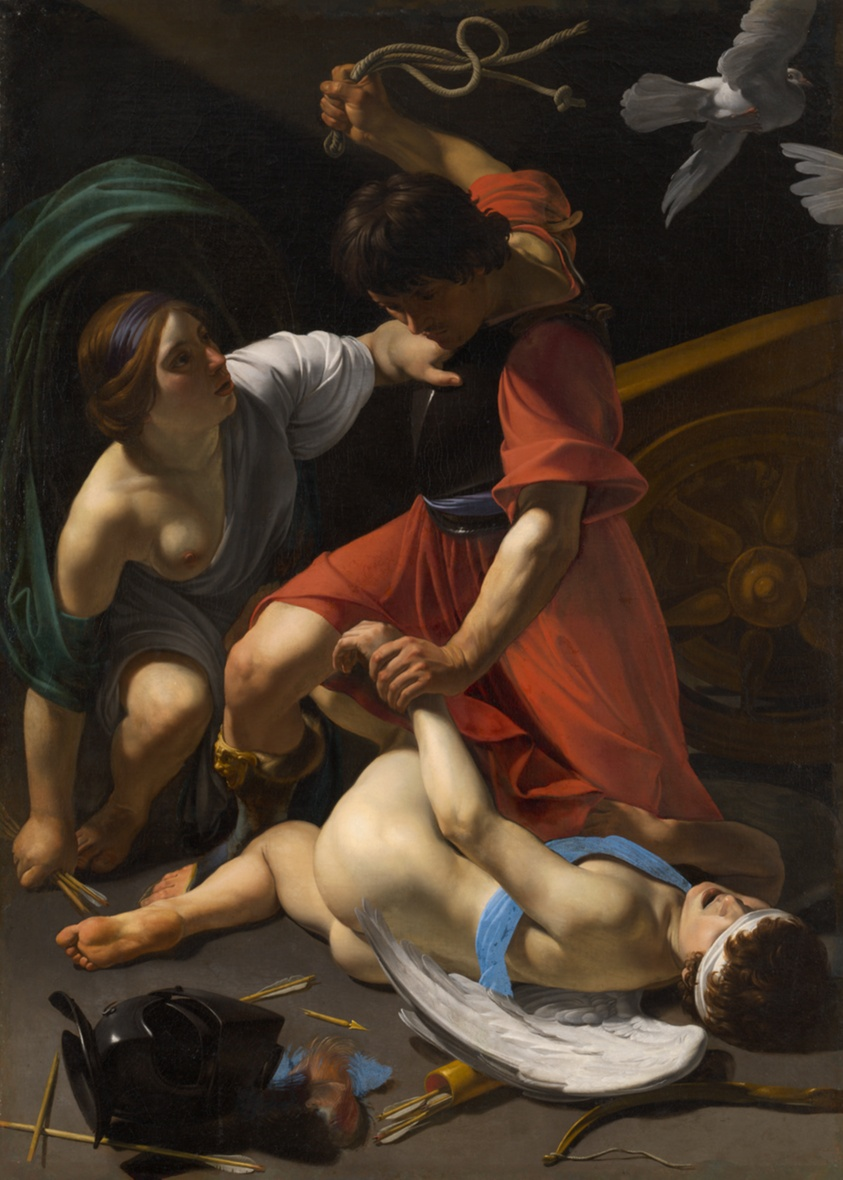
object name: Painting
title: Cupid Chastised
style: Renaissance, 17th Century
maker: Bartolomeo Manfredi (Italian, 1582–1622)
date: 1613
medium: Oil on canvas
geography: Italy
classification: oil on canvas; paint; oil paintings (visual works); Italian; painting; european painting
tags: cupids, doves, violence, mother, sons, women, men, man, woman, arrows, arrow, helmets, breasts, Cuirass, gods (deities), goddesses, Venus, war, love, nudes, conflict, Greek mythology, Greek gods, Roman, birds